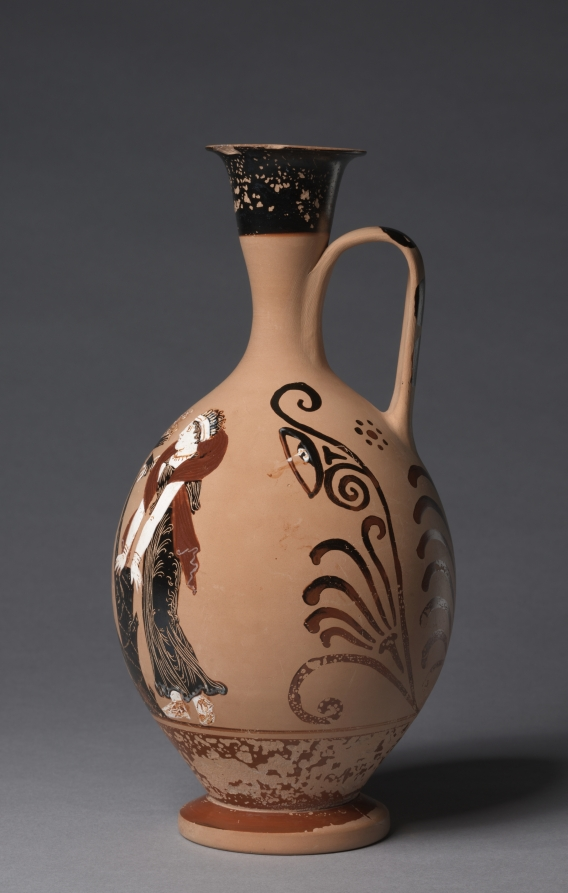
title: Black-Figure Lekythos (Oil Vessel): Pan Presenting Hare to Woman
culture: South Italian, Paestan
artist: attributed to Asteas/Python Workshop (South Italian, Paestan, active c. 360–320 BCE)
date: c. 330–320 BCE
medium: ceramic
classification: Ceramic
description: This round-bodied oil vessel, produced in Paestum, belongs to a small group of vessels decorated with black figure in the second half of the fourth century BC, long after the technique had previously fallen out of fashion. Unlike most such vessels, which are smaller and feature just a single figure (often a woman or bird), this one shows a more complex and colorful scene. The goat-legged god Pan perches on a branched tree trunk, holding his syrinx (panpipe) and a hare. Facing him, her hands on the trunk, is a draped woman, perhaps a nymph or the moon goddess Selene.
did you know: Although his name means “all” in Greek, Pan is primarily a god of shepherds.